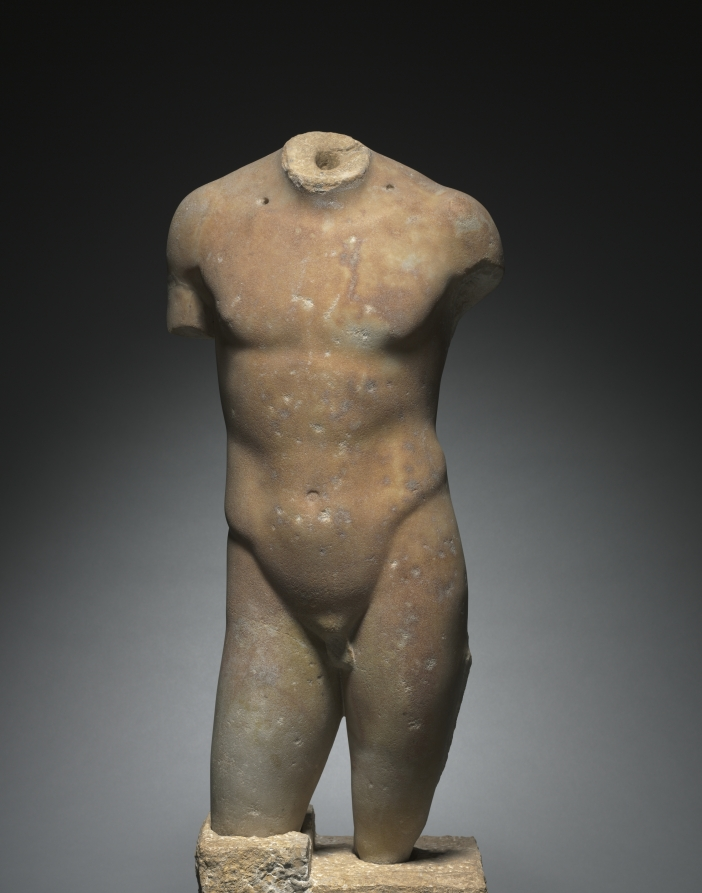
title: Torso of a Youth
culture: Greece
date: c. 150–100 BCE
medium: marble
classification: Sculpture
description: The exceptional workmanship suggests that this sculpture was carved by a Greek sculptor. Its incomplete state of preservation makes precise identification difficult, but it was most likely an Apollo or Dionysos, modeled in the soft, somewhat effeminate style of Praxiteles. The museum’s Apollo Sauroktonos is a useful parallel. The two drill holes in the upper chest are ancient and were possibly used to support separate long tresses of hair. The sculpture may well be a copy of a fourth-century original.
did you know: It was common practice in the 1700s and 1800s to attach new heads or limbs to fragmented ancient statues like this one.